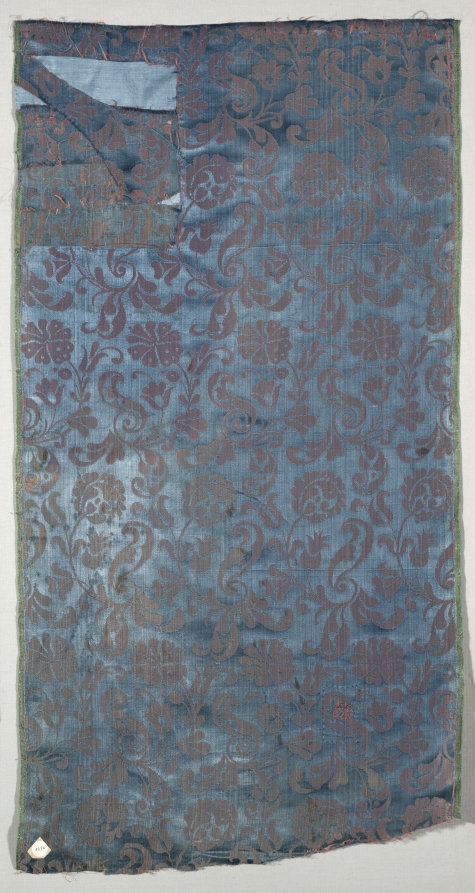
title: Length of Silk Damask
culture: Italy, late 17th - early 18th century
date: late 1600s - early 1700s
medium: damask, silk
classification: Textile